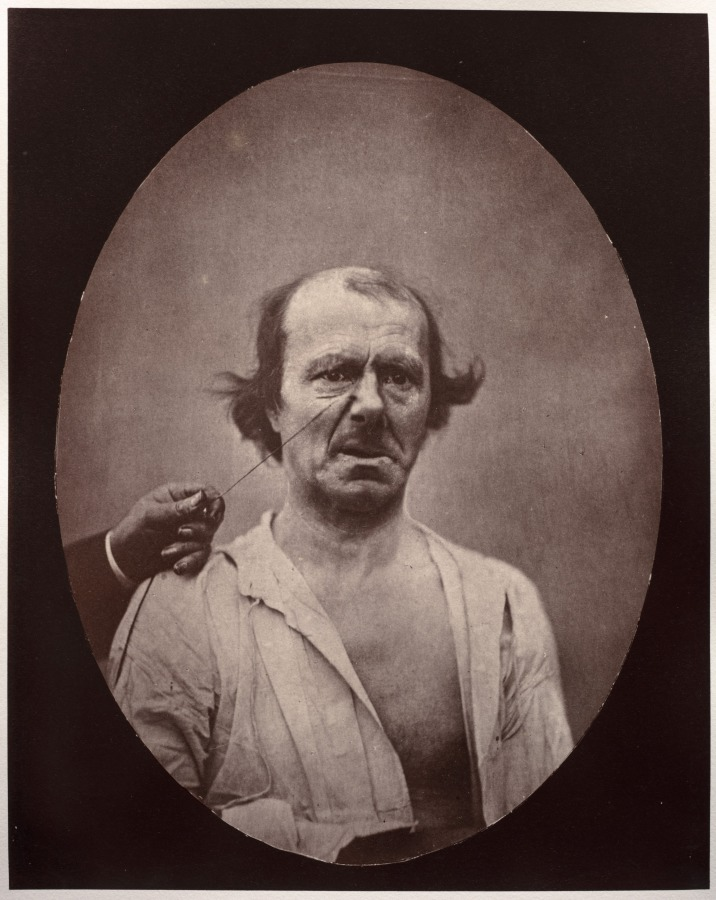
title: Figure 51: À droite, contraction partielle de l'élévateur commun de l'aile du nez et de la lèvre supérieure: mécontentement, mauvaise humeur; à gauche, repos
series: Mécanisme de la physionomie humaine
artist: Guillaume-Benjamin-Amand Duchenne (de Boulogne) (French, 1806–1875)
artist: Adrien Tournachon (French, 1825–1903)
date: c. 1856, printed 1862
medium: Albumen print from glass plate negative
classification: Photograph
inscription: On the verso, lower left, in graphite, “fig. 51”.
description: This photograph is part of the first systematic exploration of the physiology of human facial expression. In order to demonstrate how each individual muscle contributed to creating an expression, Duchenne stimulated one or more muscles on one side of the face and left the other at rest.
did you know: Duchenne, a neurologist at a hospital for the poor in Paris, turned to photography to record the grammar of human expression.